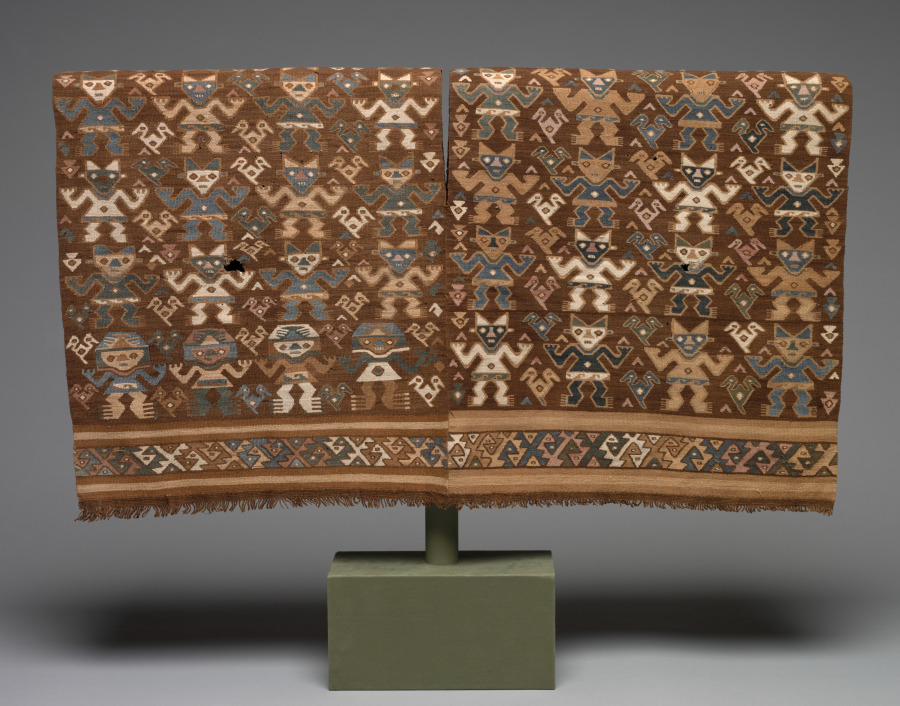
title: Tunic with Frontal Figures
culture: Central Andes, Central Coast, Ychsma (Pachacamac) people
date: 1400–1532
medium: Cotton; slit tapestry weave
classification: Textile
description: This tunic was made by weavers of the Ychsma (yeach-mah) people, who were affiliated with Pachacamac, a vast religious center that housed an oracle. The figures repeated across its composition may represent important ancestors or high-ranking members of society. The tunic likely dates to the period after the Inka Empire conquered Ychsma coastal territory, eventually becoming the largest Indigenous empire to have existed in the ancient Americas.